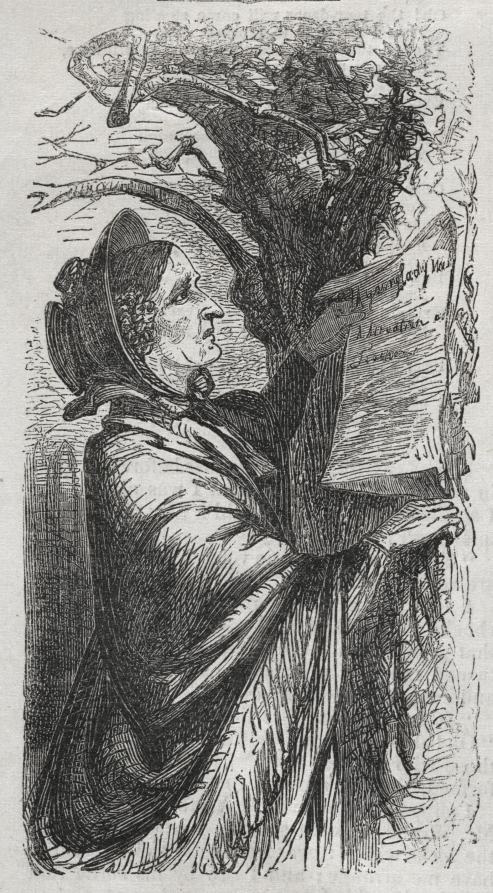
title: Untitled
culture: America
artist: Winslow Homer (American, 1836–1910)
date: 1860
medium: wood engraving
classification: Print